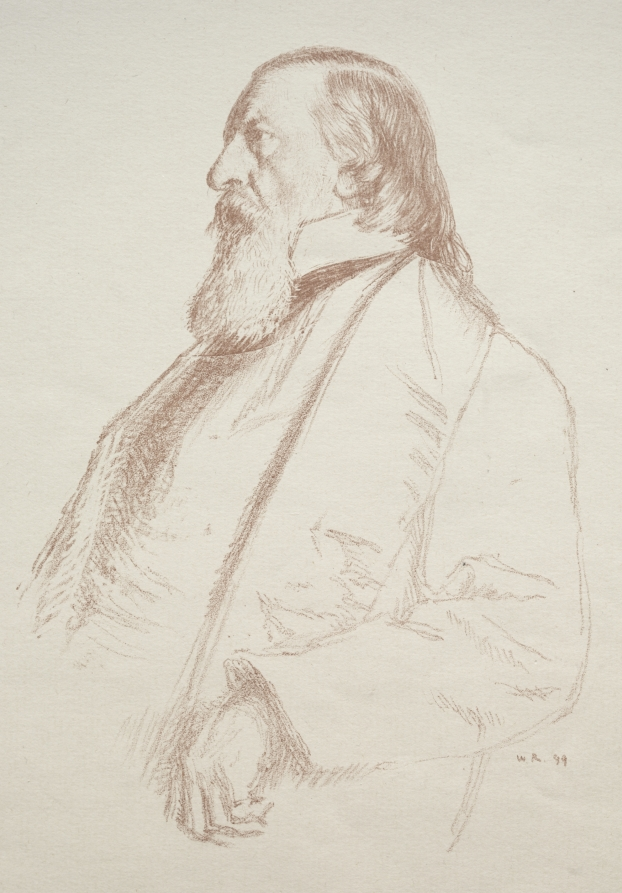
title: George Milner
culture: England, 19th-20th century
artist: William Rothenstein (British, 1872–1945)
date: c. 1899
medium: lithograph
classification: Print